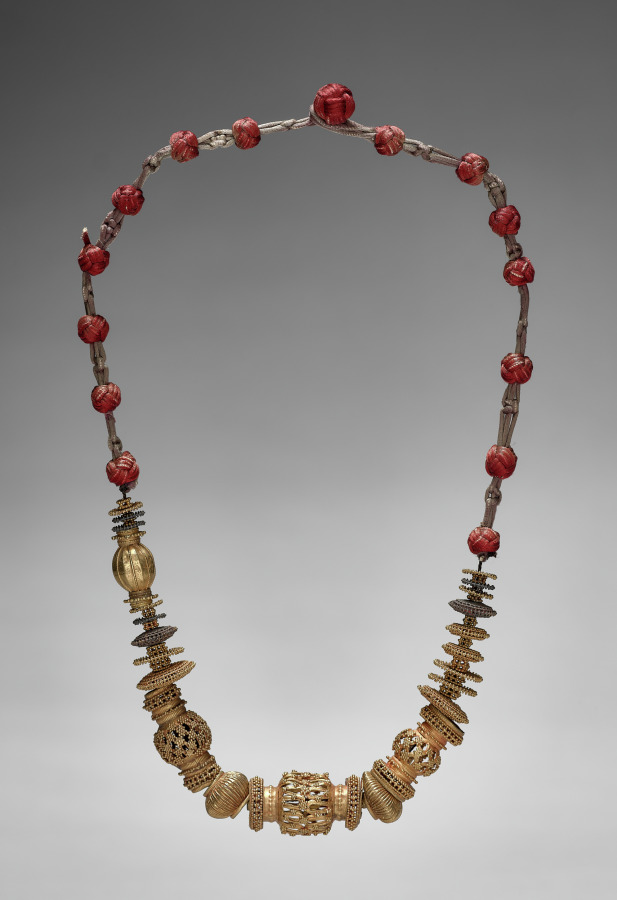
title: Necklace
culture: India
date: 1700s–1800s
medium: Gold filigree and granulation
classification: Jewelry